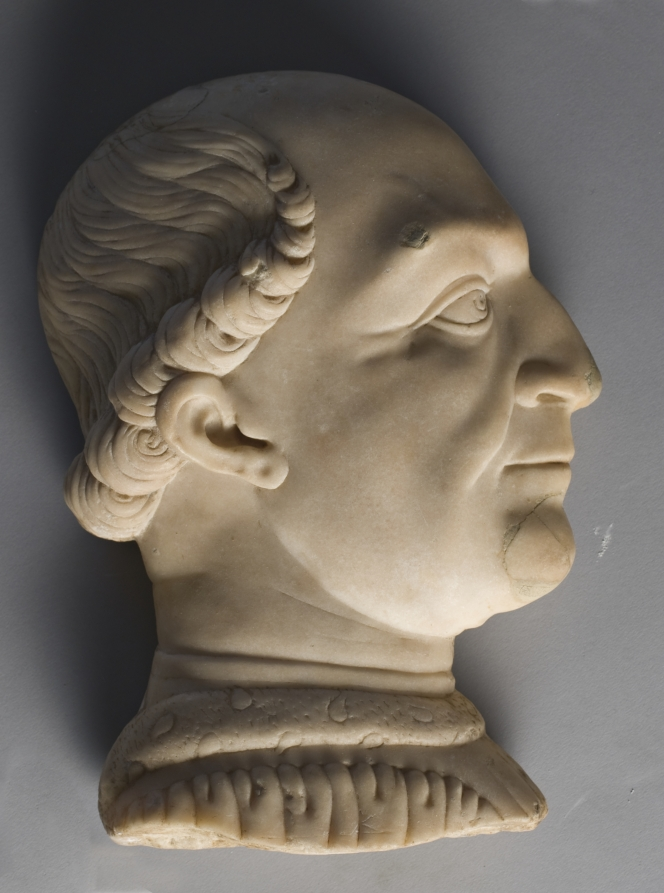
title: Portrait of Francesco Sforza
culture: Italy, Lombardy, 15th century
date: 1450–1499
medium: marble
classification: Sculpture